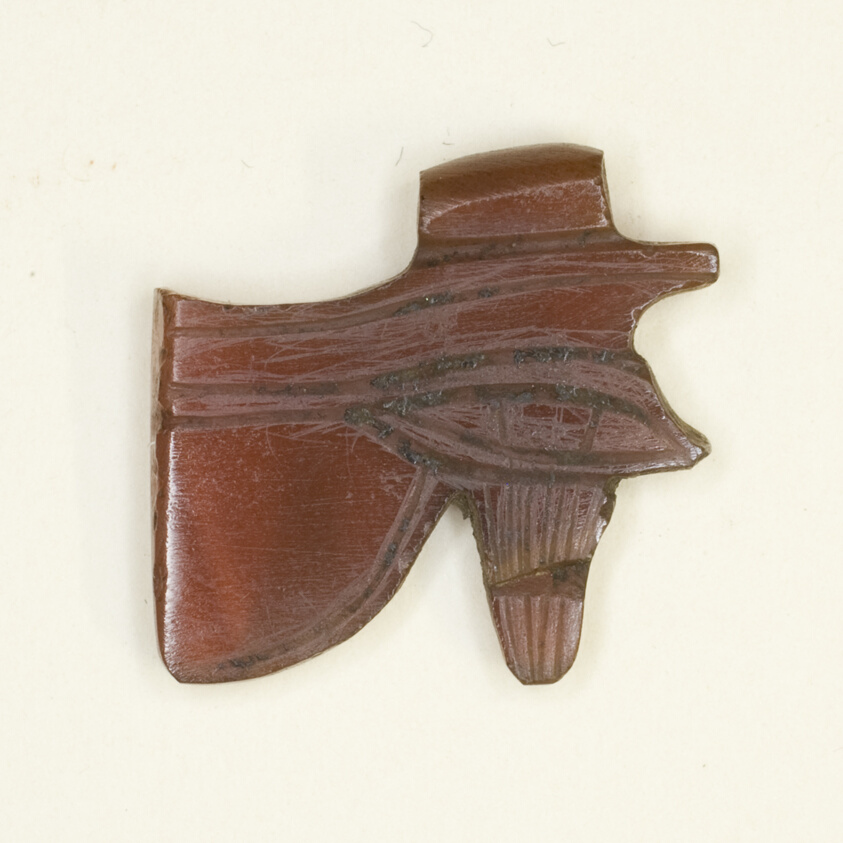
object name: Costume and Accessories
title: Eye of Horus (Wedjat) Amulet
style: egyptian, ancient, new kingdom, third intermediate period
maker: Egyptian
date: New Kingdom–Third Intermediate Period (about 1550–664 BCE)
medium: Carnelian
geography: Egypt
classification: amulet; jewelry; stone; ancient art; costume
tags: eye of Horus